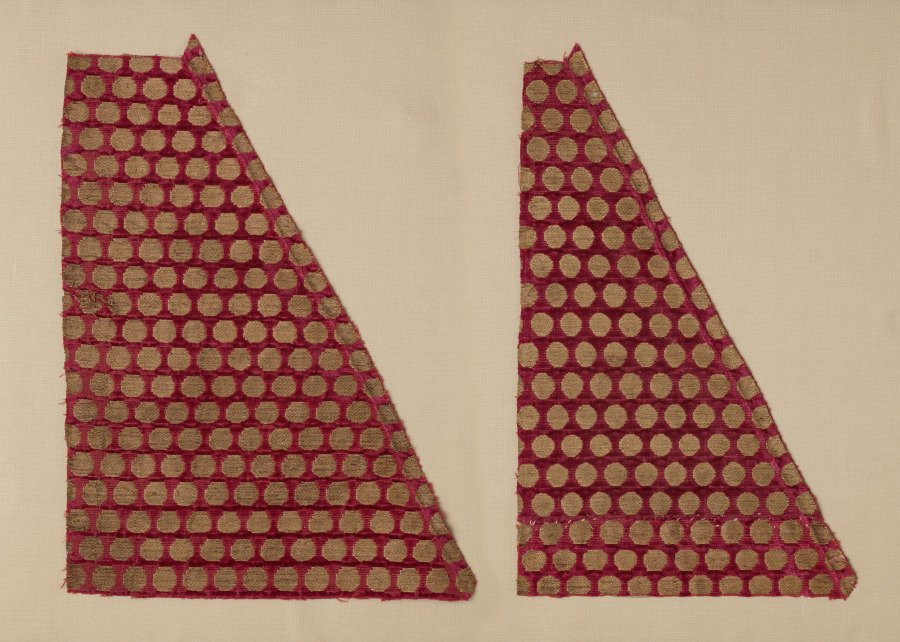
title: Velvet Fragment in Two Pieces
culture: Iran or Iraq, 14th century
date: 1300s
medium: velvet, lancé, silk and Cyprian gold around silk core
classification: Velvet